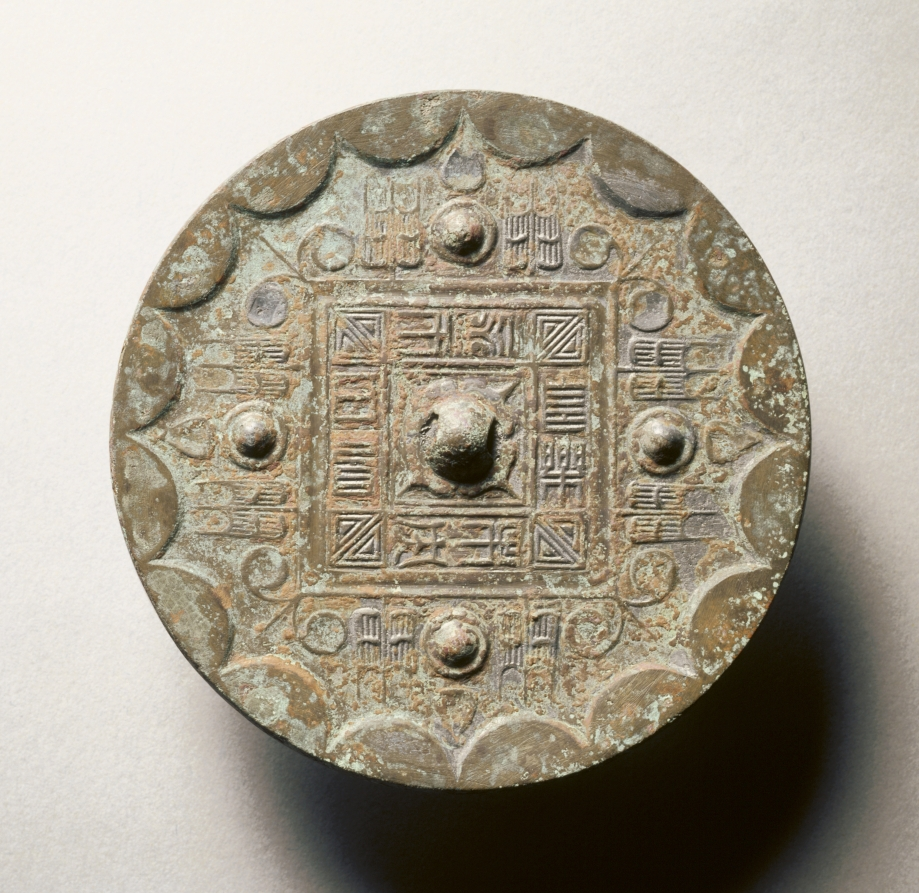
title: Mirror with a Square Band, Four Nipples, and Grass Leaf Motifs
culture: China, Western Han dynasty (206 BCE–8 CE)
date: late 300s BCE–50 CE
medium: bronze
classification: Metalwork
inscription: May you see the light of the sun, and live in everlasting joy.